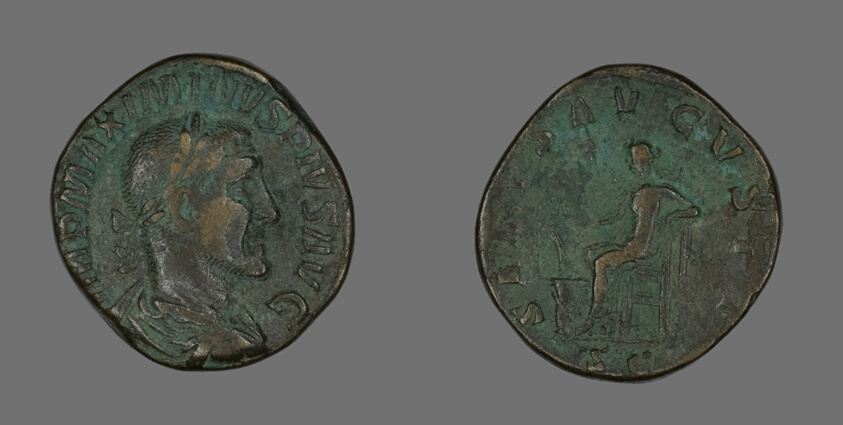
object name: Coin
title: Sestertius (Coin) Portraying Emperor Maximinus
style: roman (ancient, style or period)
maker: Roman, minted in Rome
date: 235-236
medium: Bronze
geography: Roman Empire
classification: coin; ancient art